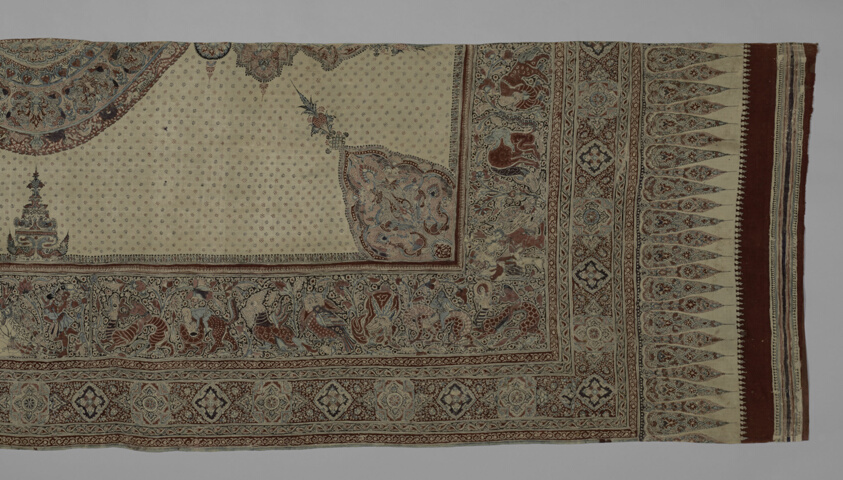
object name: Textile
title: Painted cotton with medallion and figures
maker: Deccan, India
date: 15th century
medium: cotton, plain weave; painted mordant; resist-dyed; painted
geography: India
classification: textile; weaving - printed